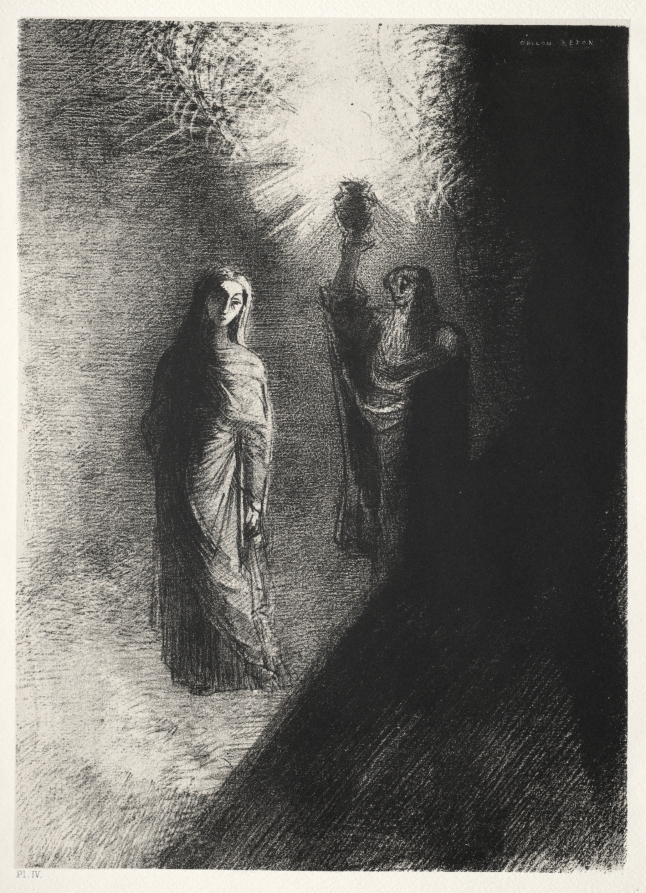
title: He Raises the Bronze Urn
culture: France, 19th century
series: The Temptation of Saint Anthony (First Series)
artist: Odilon Redon (French, 1840–1916)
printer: Becquet (French)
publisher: Edmond Deman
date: 1888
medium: lithograph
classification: Print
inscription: printed at lower left, below image: Pl. IV / Il hausse le vase d'airain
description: This portfolio is one of three made by Odilon Redon inspired by avant-garde writer Gustave Flaubert’s novel The Temptation of Saint Anthony (1874). Captivated by the book’s fantastical account of moralizing tests encountered by a hermit in the desert, Redon executed charcoal drawings and attempted to evoke that medium’s dense blackness in his lithographs. Based on the text’s darkly imaginative tone rather than its actual content, the works in this series present invented monsters and figures in otherworldly settings with jarring tonal variations. Although Redon felt that the prints effectively translated the surreal universe of his source material, they were largely misunderstood in his own time.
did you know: Publisher Edmond Deman commissioned this portfolio after he saw an 1886 exhibition of Redon's work in Brussels, Belgium.